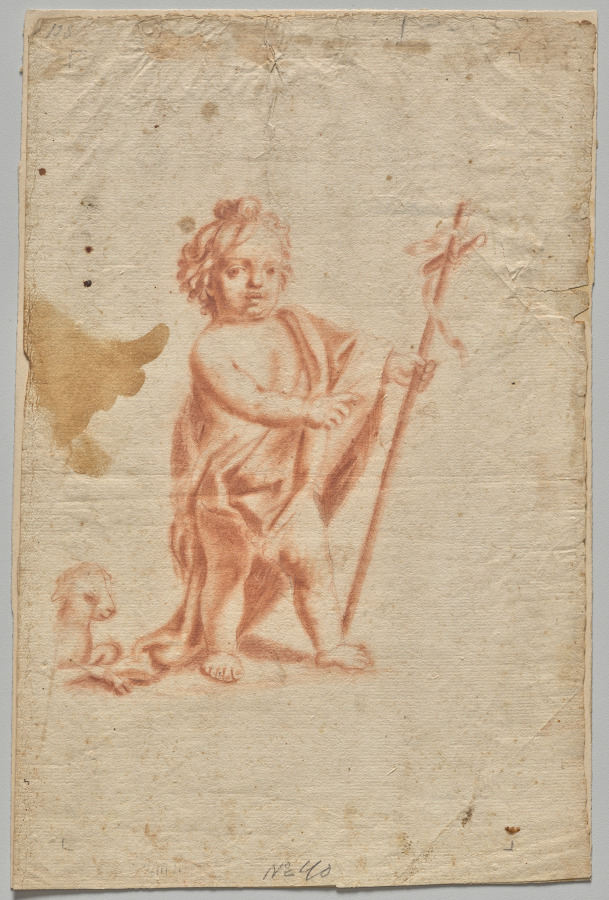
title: The Infant St. John the Baptist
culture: Germany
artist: attributed to Godfrey Kneller (British, 1646–1723)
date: fourth quarter 17th century or first quarter 18th century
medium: red chalk, with stumping over traces of graphite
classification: Drawing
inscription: upper left, in graphite: 128 ; lower center, in graphite: N° [o underlined twice] 40 ; VERSO OF SECONDARY SUPPORT, upper center, in graphite: Sir G. [partially masked] Kneller ; upper center, in graphite: 50ºº [circled] ; upper right, in graphite: 70°° [crossed out] [circled]